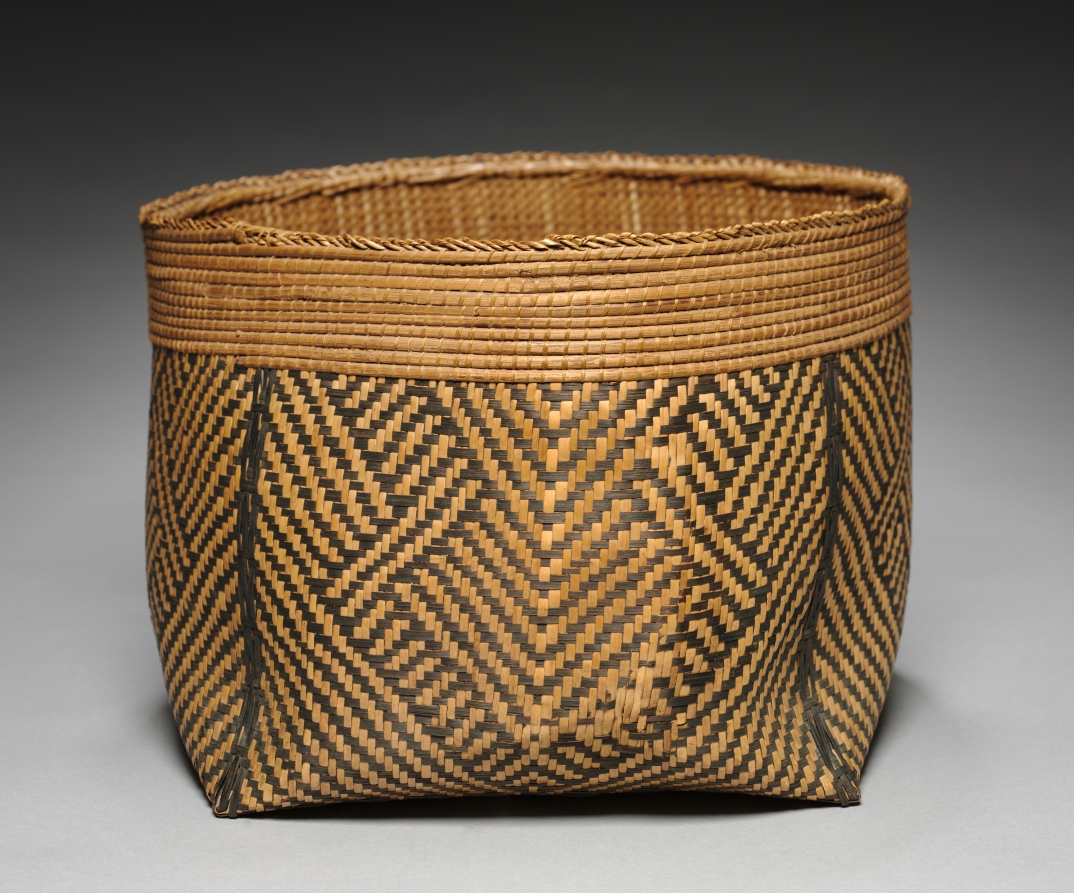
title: Basket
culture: Africa, Central Africa, Democratic Republic of the Congo, Mangbetu-style maker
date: by 1928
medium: Plant fibers and dye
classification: Basketry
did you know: This woven hat looks brand new because it was one of the many items the business-savvy chief of Ekibondo had artists and artisans make for the foreigners who passed through his village.